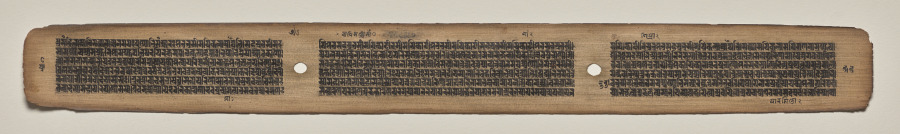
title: Text, Folio 56 (verso), from a Manuscript of the Perfection of Wisdom in Eight Thousand Lines (Ashtasahasrika Prajnaparamita-sutra)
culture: Eastern India, Bihar, Vikramashila Monastery. Painting: Nepal, Kathmandu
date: Sunday, September 14, 1119 (year 239 of the Newar Samvat in the month of Ashvina)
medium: gum tempera and ink on palm leaves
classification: Painting